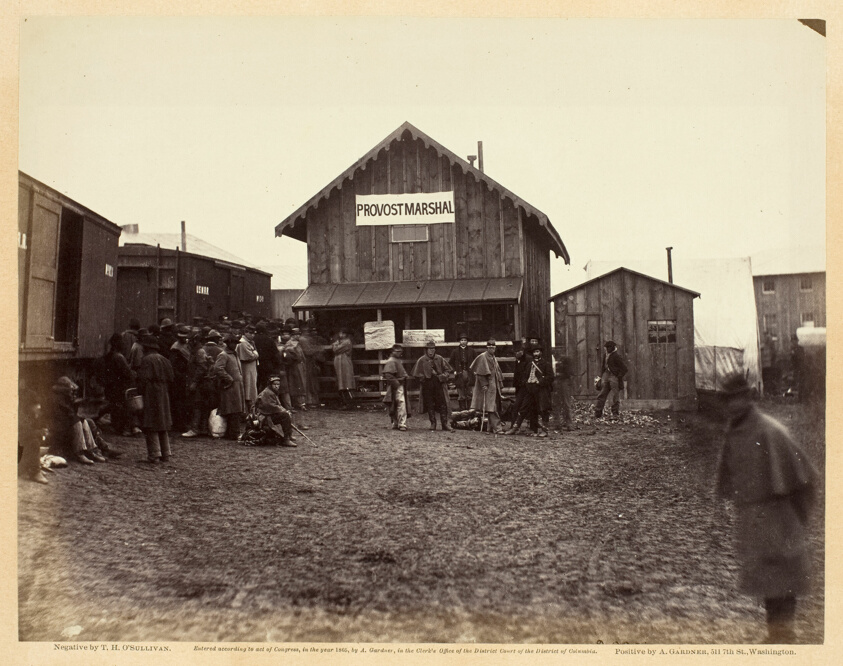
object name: Photograph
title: Provost Marshal's Office, Aquia Creek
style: 19th century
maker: Timothy O'Sullivan (American, born Ireland, 1840–1882)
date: February 1863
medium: Albumen print, pl. 46 from the album "Gardner's Photographic Sketch Book of the War, vol. 1" (1866)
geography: United States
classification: photograph; albumen silver print; photography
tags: Collected by Hugh Edwards, Gardner's Photographic Sketch Book